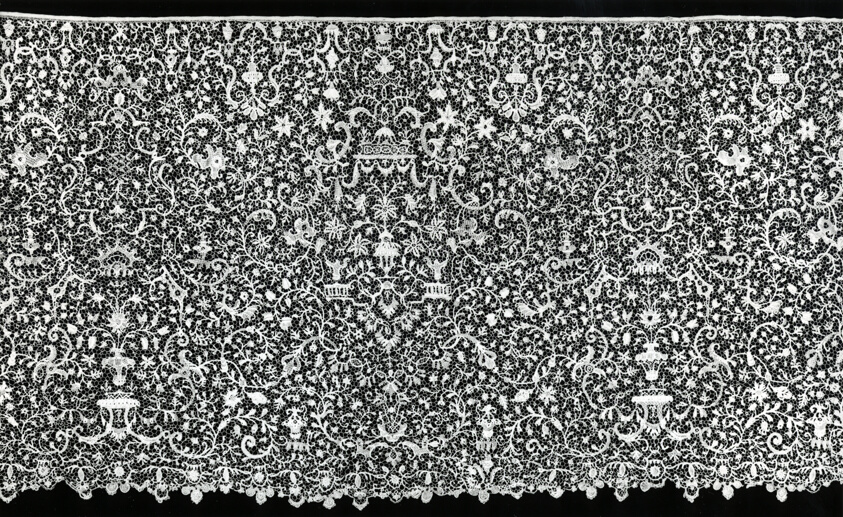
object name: Textile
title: Flounce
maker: France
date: c. 1700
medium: Linen, needle lace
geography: France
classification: textile; lace - needle